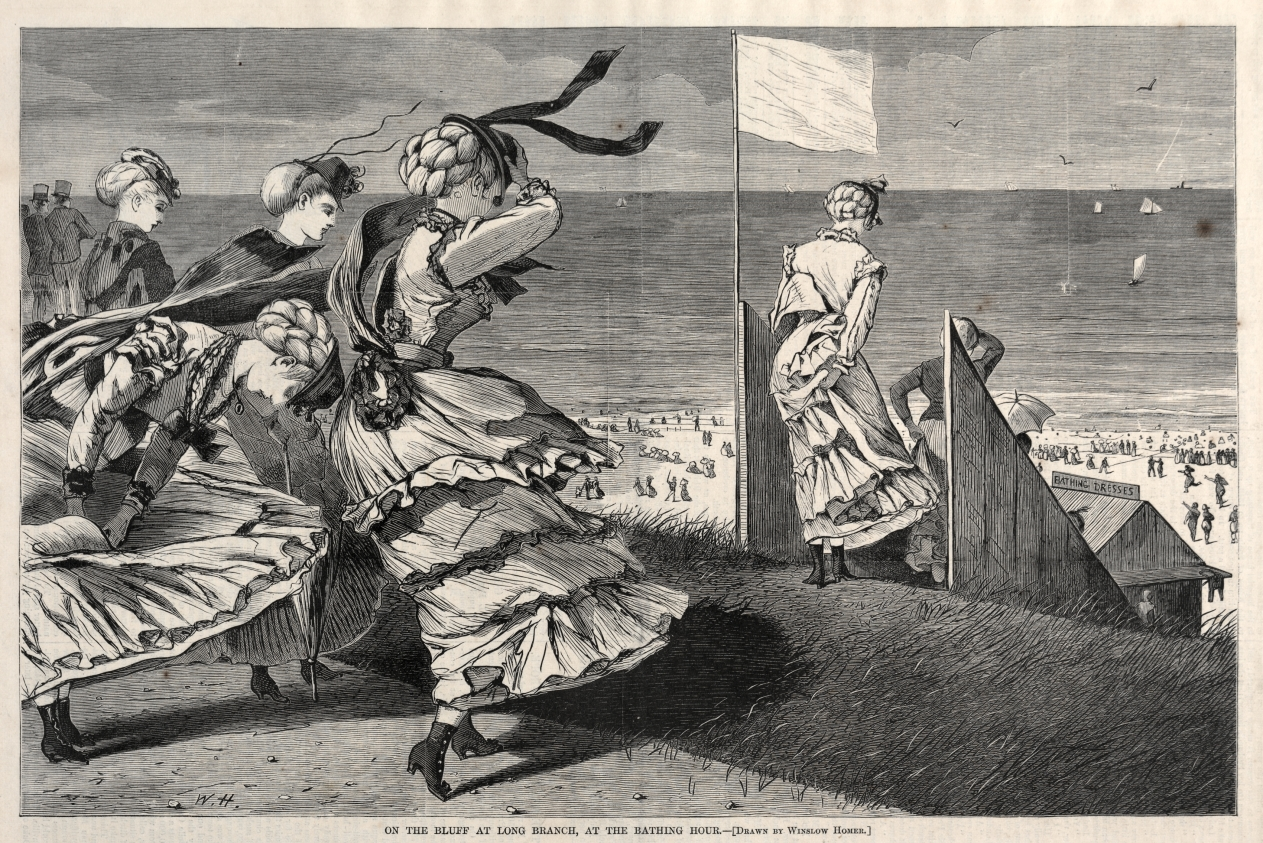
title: On the Bluff at Long Branch, at the Bathing Hour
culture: America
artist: Winslow Homer (American, 1836–1910)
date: 1870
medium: wood engraving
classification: Print